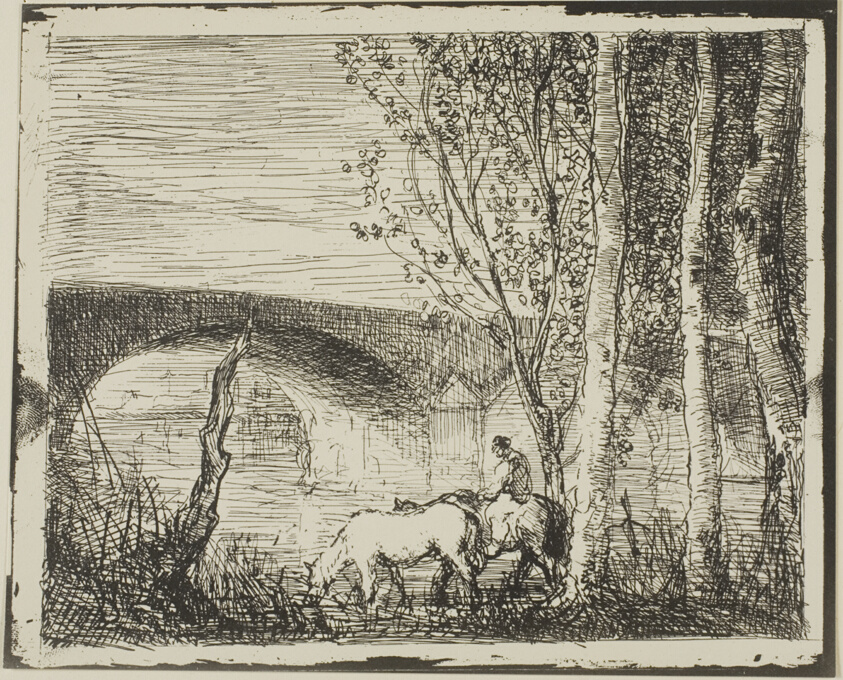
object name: Print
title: Bridge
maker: Charles François Daubigny (French, 1817-1878)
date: 1862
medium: Cliché-verre on ivory photographic paper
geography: France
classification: cliché-verre; print; prints and drawing